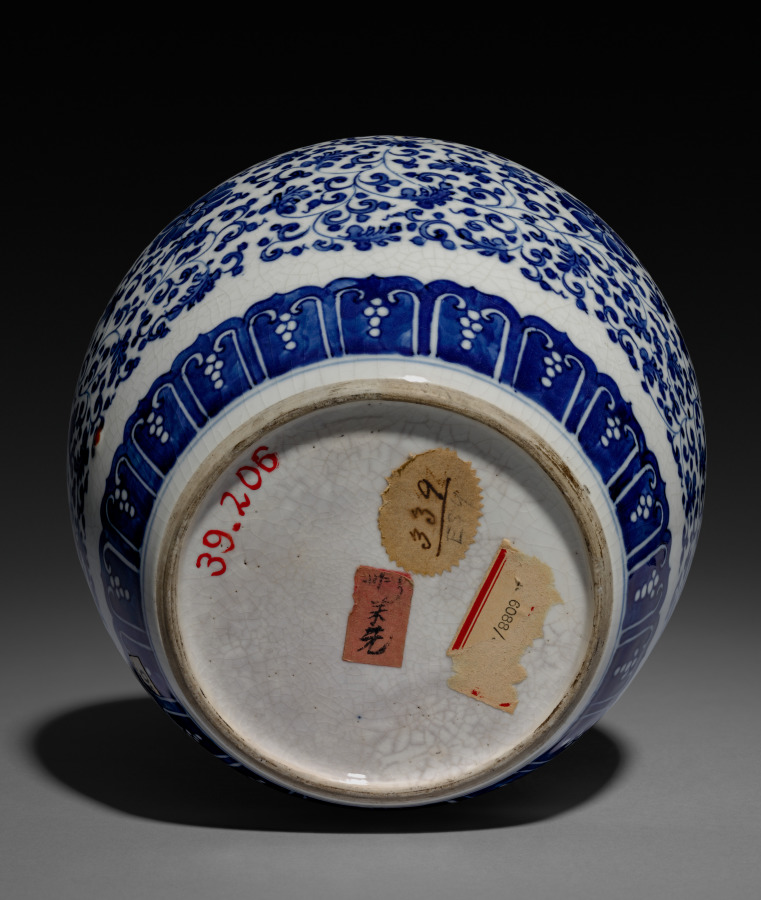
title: Ginger Jar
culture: China, Qing dynasty (1644–1911), Qianlong reign (1736–95)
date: 1736–95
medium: porcelain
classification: Ceramic